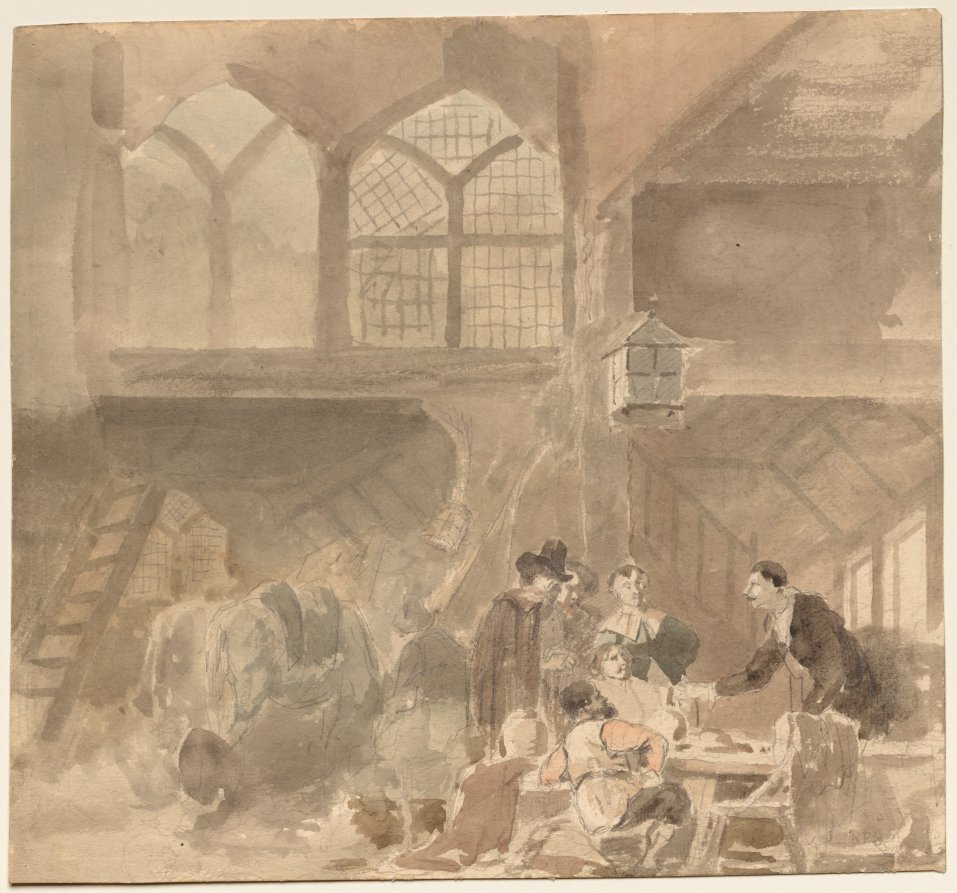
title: Interior of an Inn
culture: Netherlands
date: 1800s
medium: watercolor and graphite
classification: Drawing